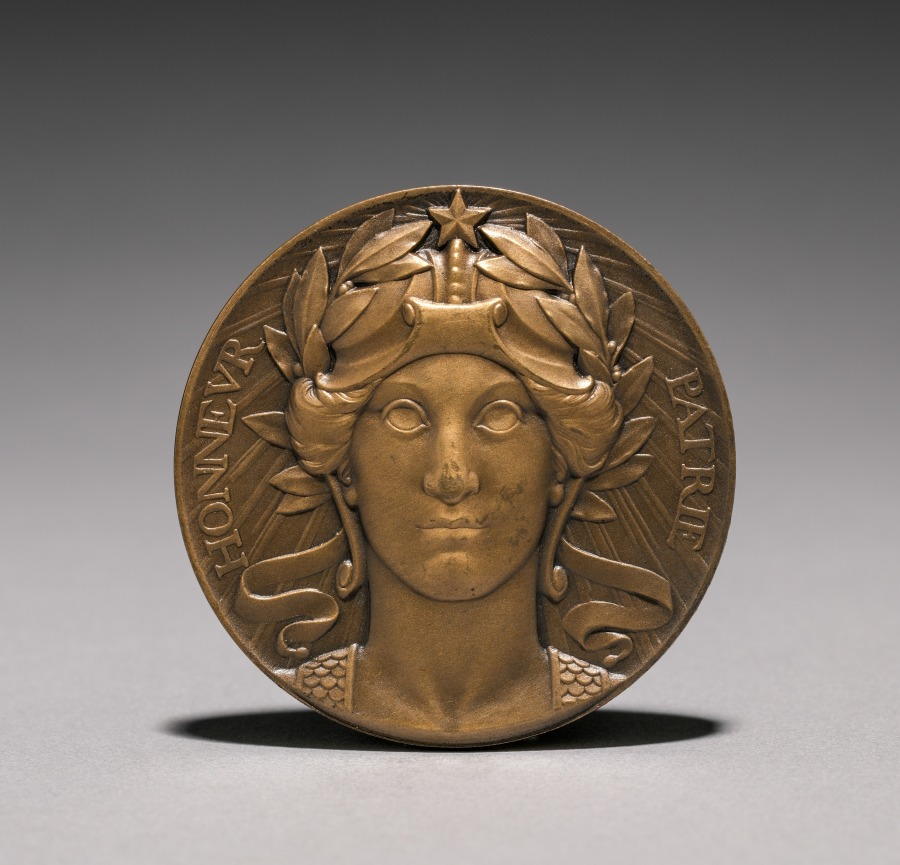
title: Medal (obverse)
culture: France, 20th century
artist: Auguste Dujardin (French, 1847–1918)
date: 1914–1916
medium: bronze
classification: Metalwork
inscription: "Honneur Patrie."